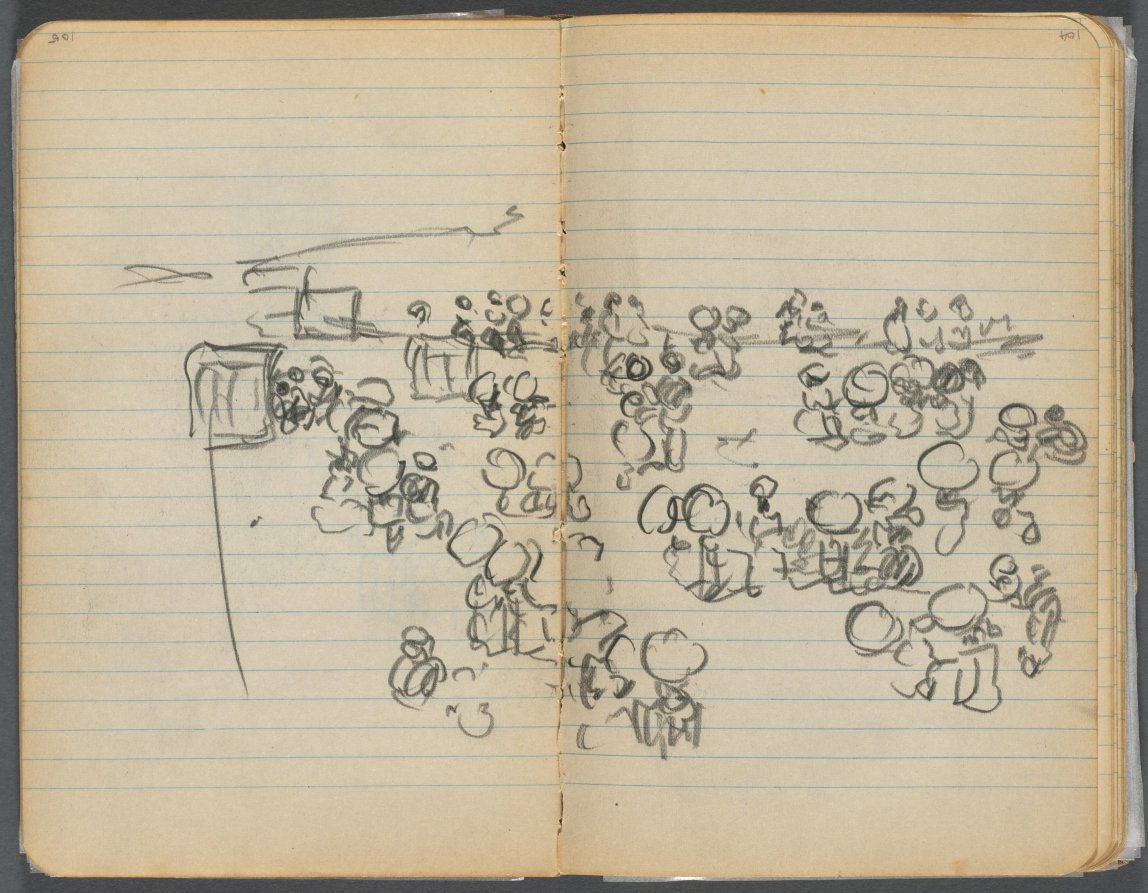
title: Sketchbook, page 104 & 105: Beach View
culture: America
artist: Maurice Prendergast (American, born Newfoundland [now Canada], 1858–1924)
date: 1905–10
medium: graphite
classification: Bound Volume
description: This sketchbook contains 69 pages of drawings, a diary largely devoted to the state of the artist's health, and a three-page discourse on the nature of genius and ideas.